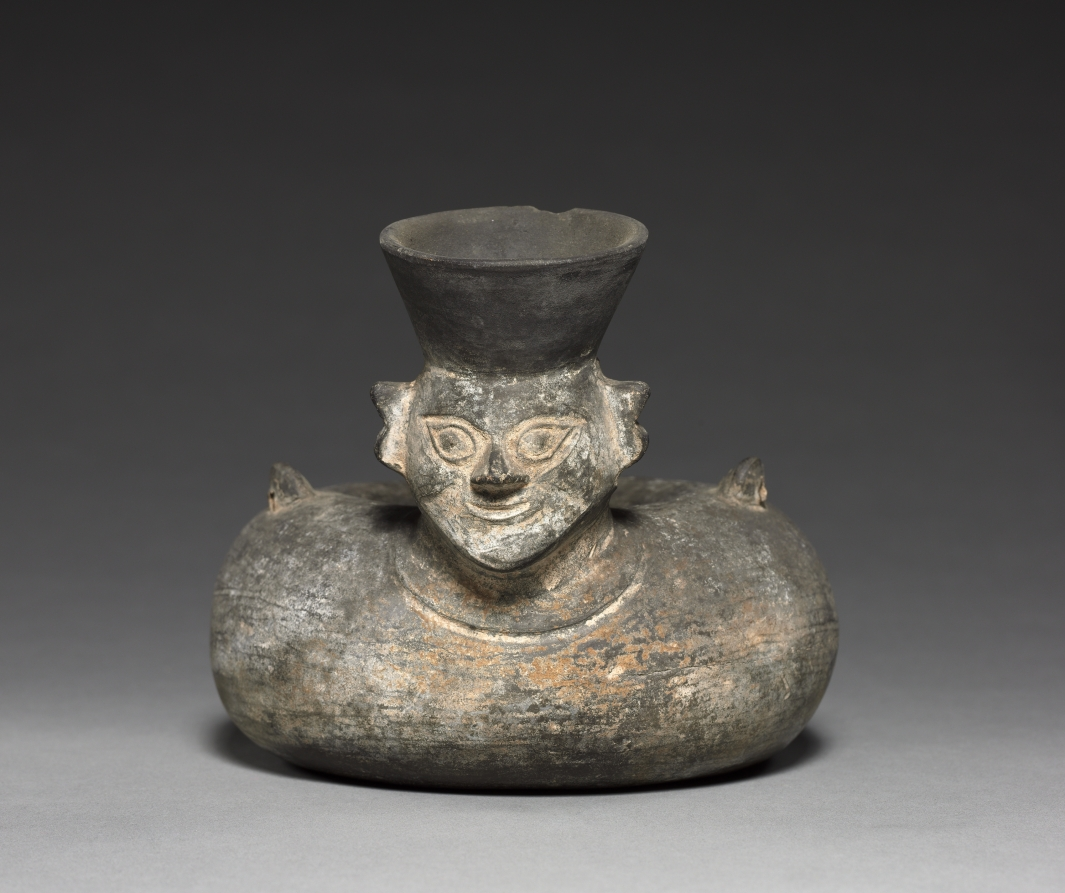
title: Funeral Urn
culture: Peru, Chimú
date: c. 1150–1530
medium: black ware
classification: Ceramic